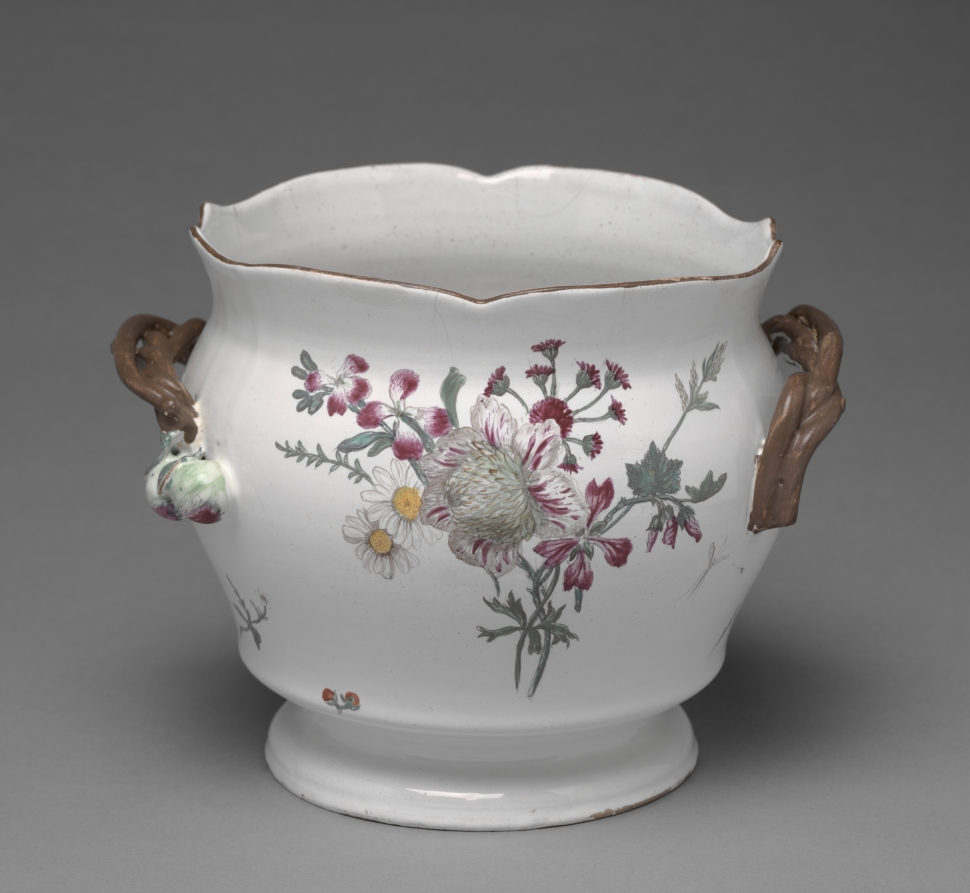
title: Wine Cooler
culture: France, Marseilles, 18th century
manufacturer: Joesph- Gaspard Robert Factory (French)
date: c. 1760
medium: tin-glazed earthenware (faience) with enamel decoration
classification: Ceramic